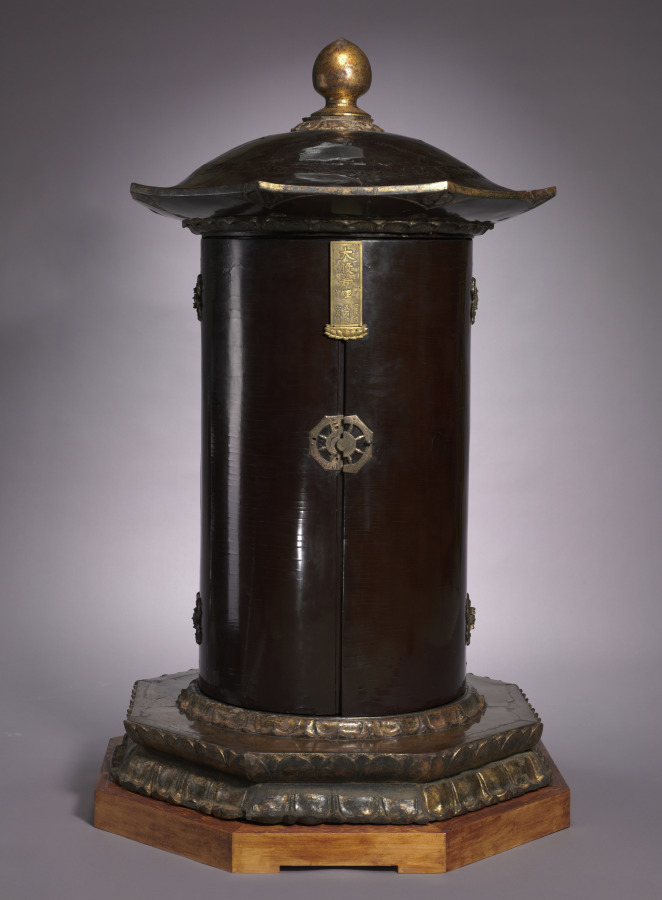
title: Repository for the Great Perfection of Wisdom Sutra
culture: Japan, Heian period (794–1185)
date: late 1100s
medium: lacquered wood with ink, color, gold, cut gold, and metalwork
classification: Lacquer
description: This repository is one of a pair that once contained the scrolls of a religious text called the Great Perfection of Wisdom Sutra. Two discs painted on the back have the sacred syllables representing the Buddha Shakyamuni and the Buddha Amida. Eight of the 16 benevolent but fierce looking deities who protect the text appear on the doors.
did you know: The mate to this object is in the Nara National Museum in Japan.